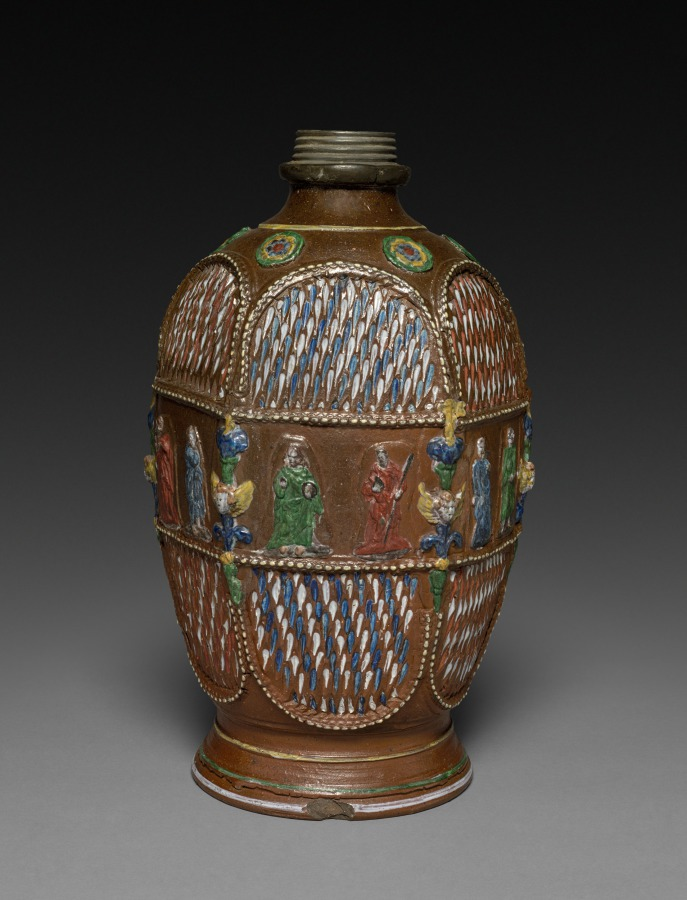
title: Bottle (Schraubflasche)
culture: Germany, Bavaria, Kreussen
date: c. 1660–80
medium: salt-glazed stoneware, applied and impressed decoration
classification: Ceramic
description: Bottles or jars (kruken) of this type of six-sided form are most often associated with the ceramic tradition found in Kreussen (now Creussen) in the Bavarian region of Germany during the mid to late 1600s. With a threaded neck fitted with a pewter screw top and ring, they were ideal vessels for medicinal liquids as they could be easily connected to a belt for transport to the patient. Applied decoration depicting the twelve apostles, as on this example, allude to the spiritual nature of healing.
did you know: The applied decoration on this bottle depicts the twelve apostles.